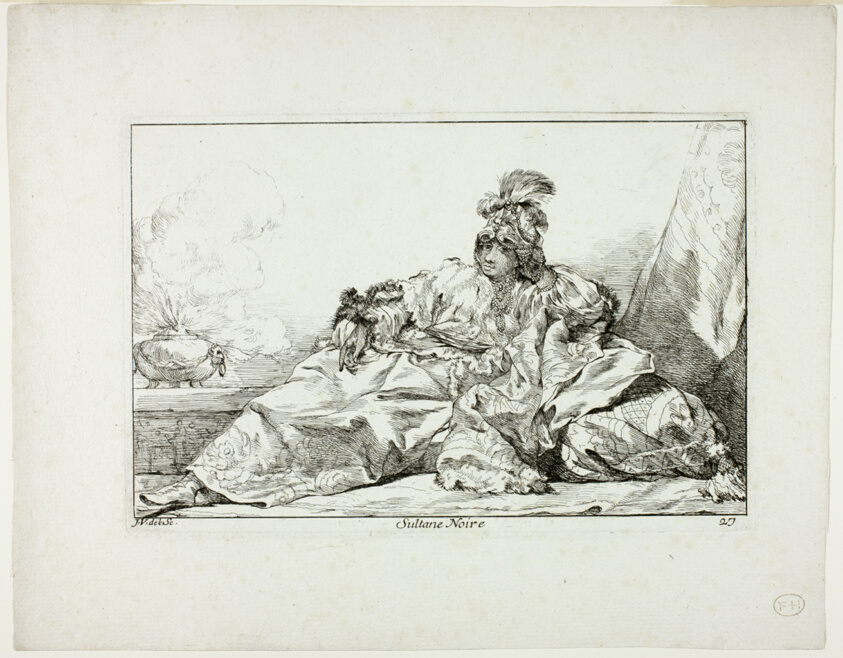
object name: Print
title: Sultane Noire, plate 27 from Caravanne du Sultan à la Mecque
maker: Joseph-Marie Vien, the elder; French, 1716–1809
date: 1748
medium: Etching on ivory laid paper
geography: France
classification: etching; paper; print; prints and drawing